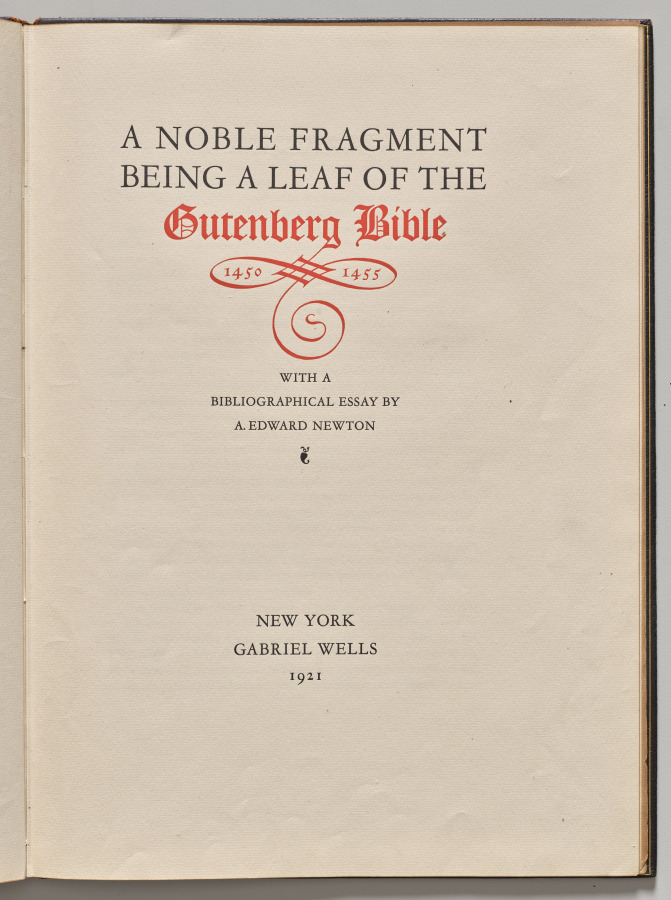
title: Page from a Gutenberg Bible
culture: Germany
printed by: Johann Gutenberg (German, c. 1397–1468)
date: c. 1450–1455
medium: printed page with hand-applied initials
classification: Bound Volume